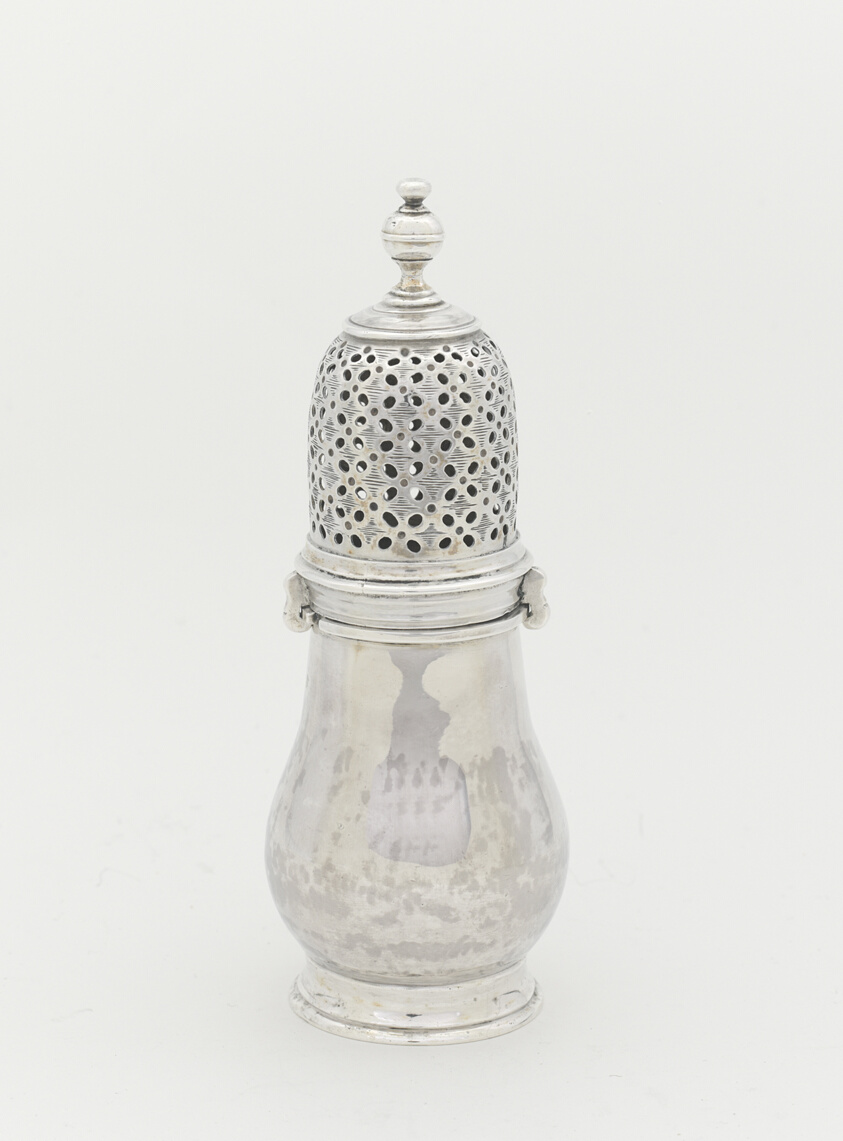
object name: Metalwork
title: Caster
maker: Andrew Tyler; American, c. 1692/93–1741; Boston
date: c. 1735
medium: Silver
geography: Boston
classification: condiment vessel; silver; american decorative arts; american arts; decorative arts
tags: dining, drinking